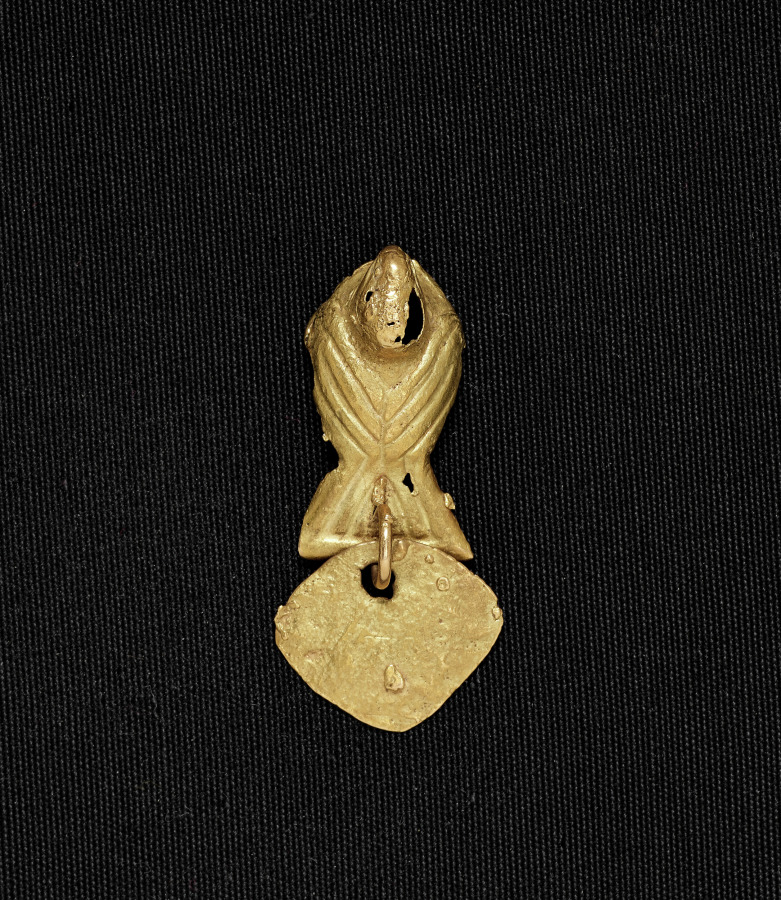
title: Bird Bead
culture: Colombia, Muisca style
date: c. 900–1550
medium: cast gold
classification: Jewelry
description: Muisca metalwork divides into two categories: ornaments to be worn, such as these, and offering figurines, in the case to the right. The elaborate bird pendant features delicate herringbone moldings, openwork patterns, and wing details-all part of the wax model from which the pendant was cast (see nearby computer animation). The dangles were attached after casting.